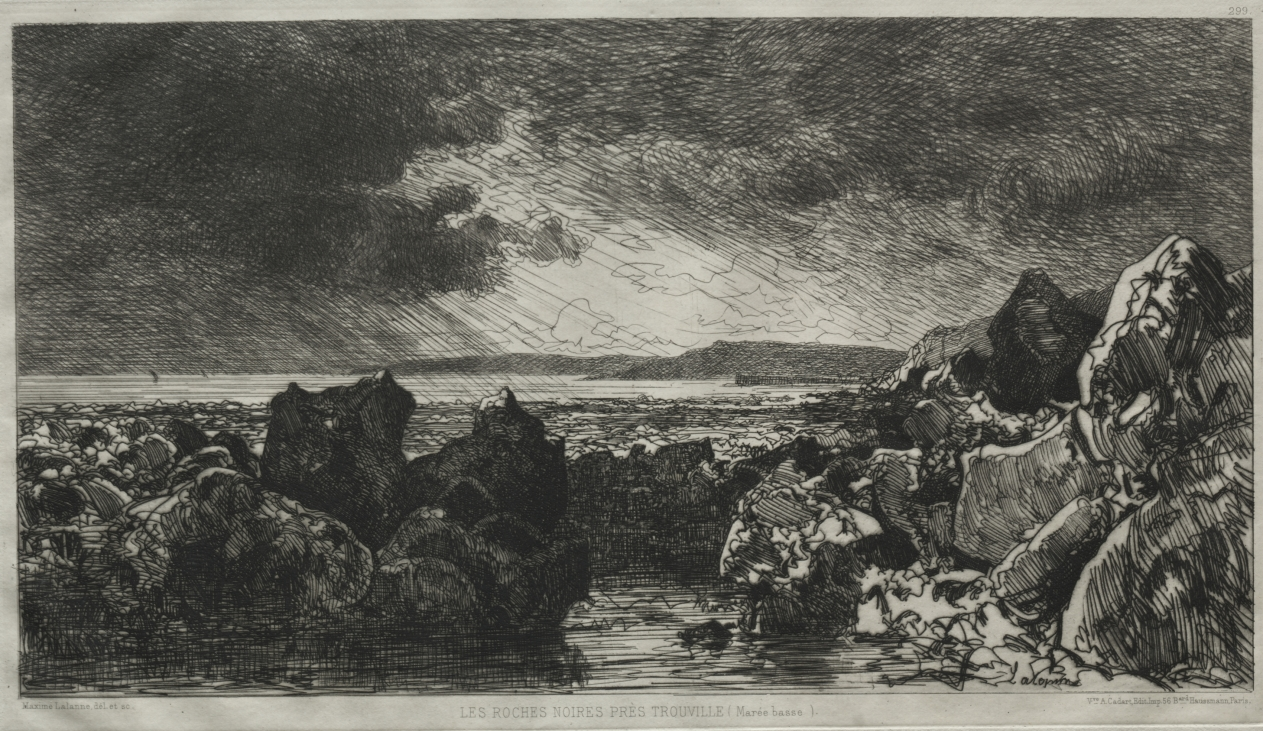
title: Black Rocks near Trouville (Low Tide)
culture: France, 19th century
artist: Maxime Lalanne (French, 1827–1886)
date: 1874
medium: etching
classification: Print